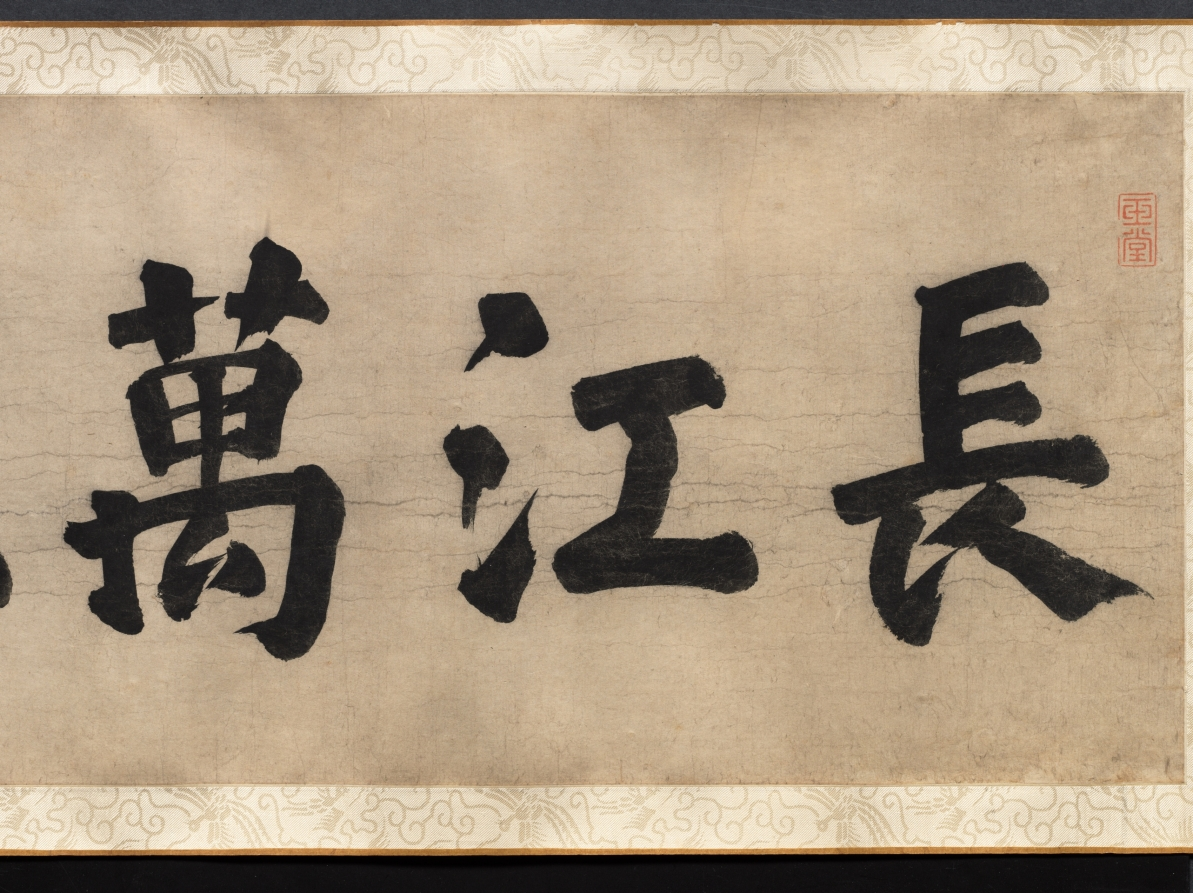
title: Ten Thousand Li of the Yangzi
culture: China, Ming dynasty (1368–1644)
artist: Dai Jin (Chinese, 1388–1462)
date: c. 1400s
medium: Handscroll; ink and color on paper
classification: Painting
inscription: Two colophons at end. Artist's seals: Dai Jin 戴進 and Wenjin 文進.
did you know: Dai Jin is traditionally considered the founder of the Zhe School, a style of landscape painting.